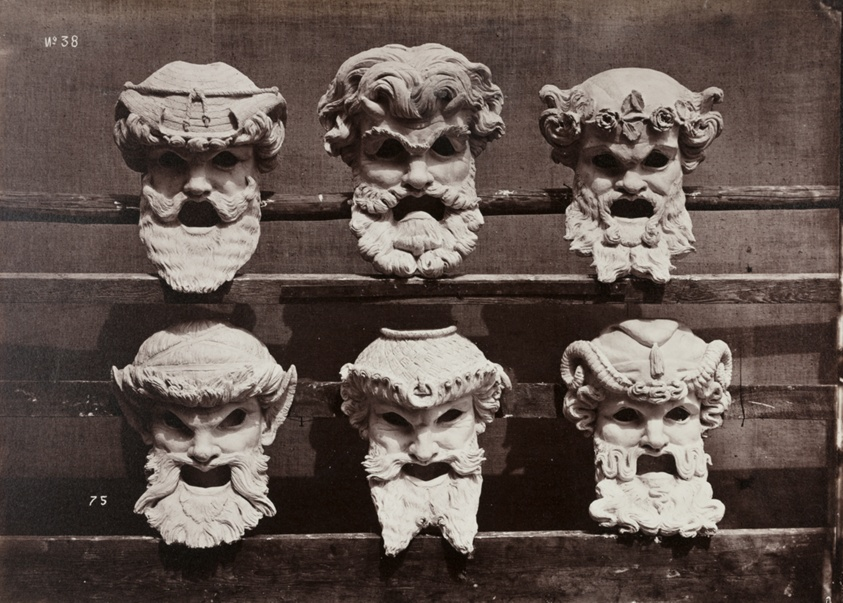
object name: Photograph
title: Masks from the Control Room (Masques du vestibule de contrôle)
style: 19th century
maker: Louis-Emile Durandelle (French, 1839–1917)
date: c. 1870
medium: Albumen print, from "Le Nouvel Opéra de Paris, Sculpture Ornementale" (1875)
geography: France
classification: photograph; albumen silver print; photography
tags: Paris